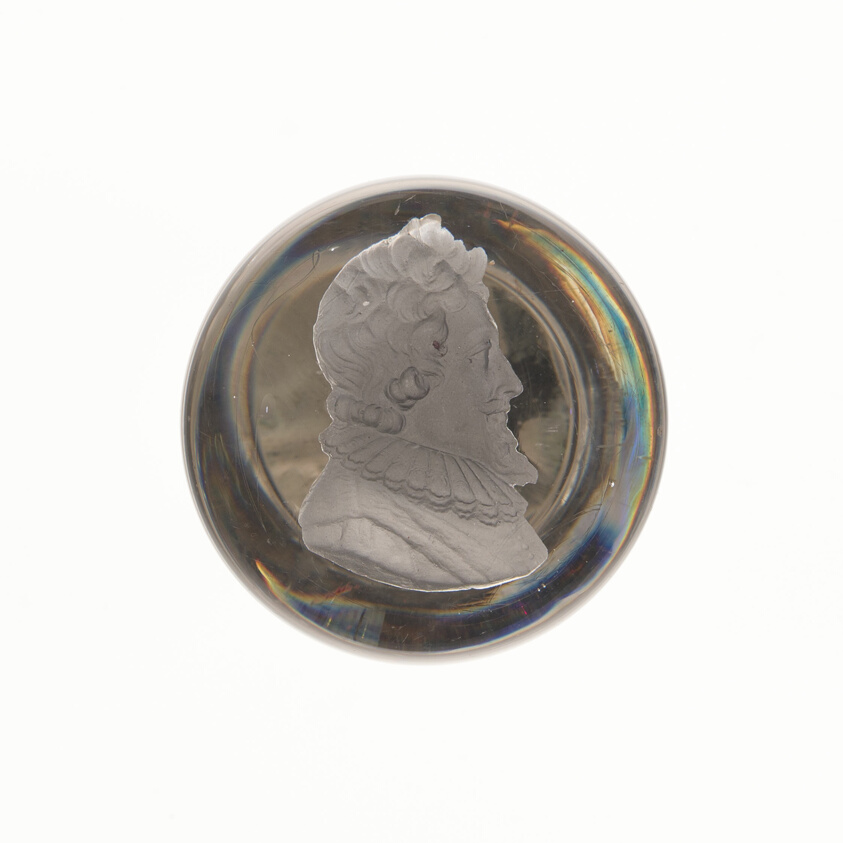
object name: Glass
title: Doorknob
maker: American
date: c. 1846–55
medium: Glass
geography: United States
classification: paperweight; glass; european decorative arts